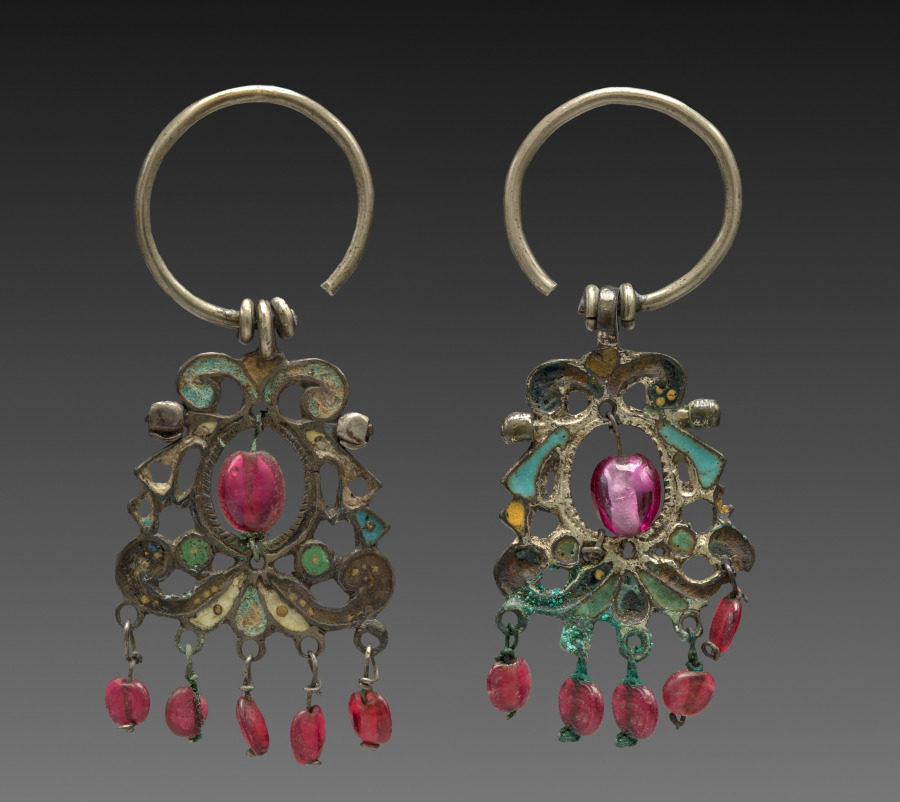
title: Earring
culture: Russia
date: 1800s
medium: silver, enamel, and red glass beads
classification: Jewelry